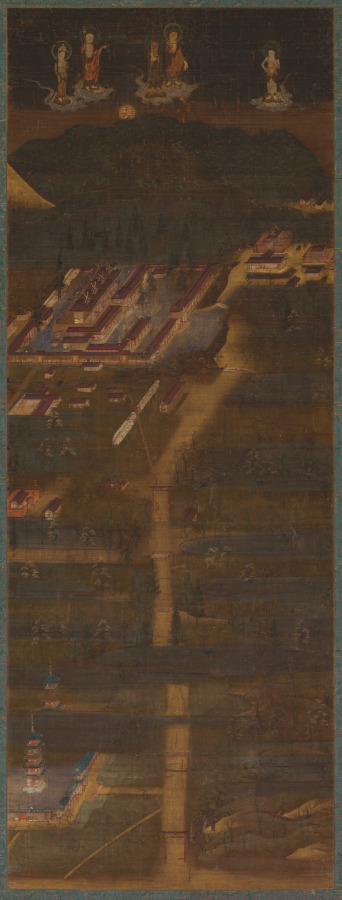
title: Kasuga Shrine Mandala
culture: Japan, Kamakura period (1185–1333)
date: early 1300s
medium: Hanging scroll; ink, color, and gold on silk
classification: Painting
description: A golden path beginning at the bottom of this painting leads up to four red-and-white buildings to the left, then to a fifth building on the right. These are the five shrine halls of Kasuga Taisha in Nara. Above and beyond the buildings is a sacred mountain range––with Mount Mikasa at center, Mount Wakakusa in gold to the left, and the sun or moon rising up behind the mountains. Sacred deer appear here and there. Five figures representing the original Buddhist forms of the five kami of the shrine complex stand on clouds above the mountains.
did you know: Sacred deer, the vehicles of the Kasuga deities, move about the shrine compound.